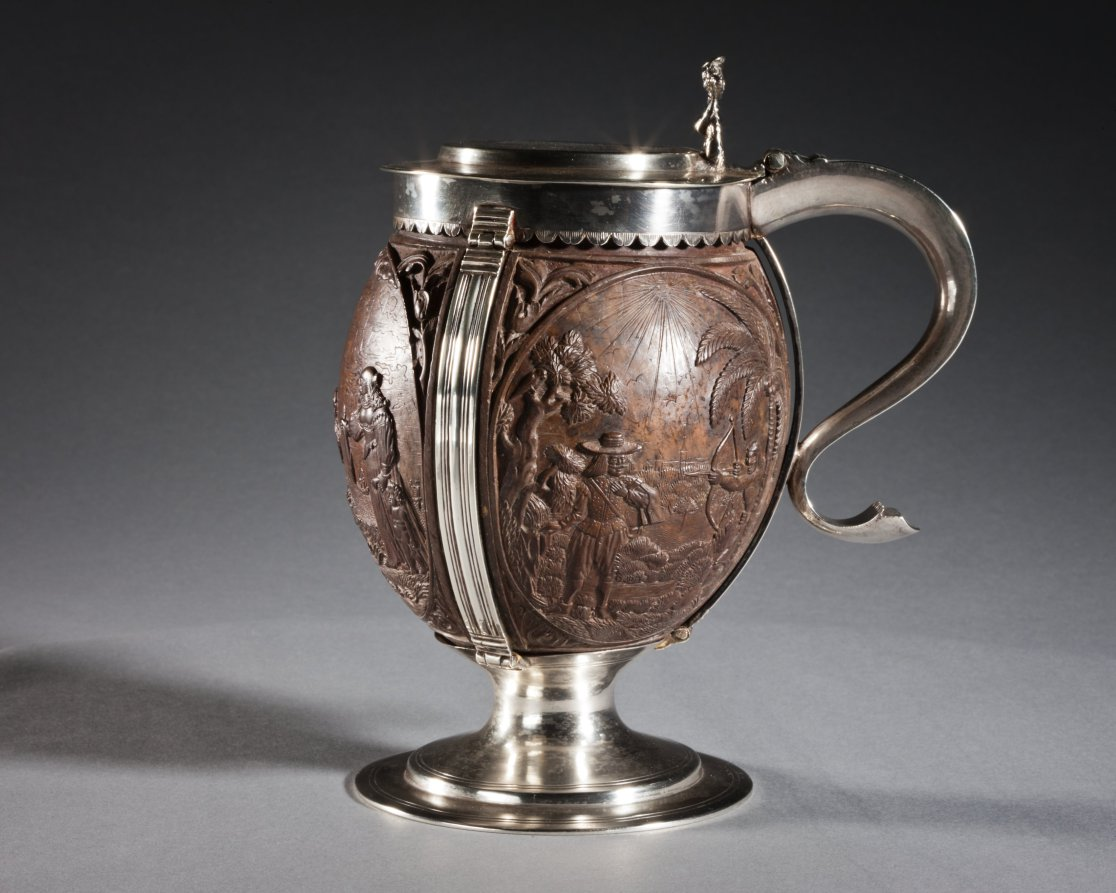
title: Coconut Cup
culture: carved coconut, probably The Netherlands; silver mount, probably England, 17th century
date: c. 1630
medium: carved coconut in silver mount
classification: Metalwork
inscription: top lid has engraved coat-of-arms, underside of lid has inscription: George Lewis TIVERTON Feby, 1st 1760.